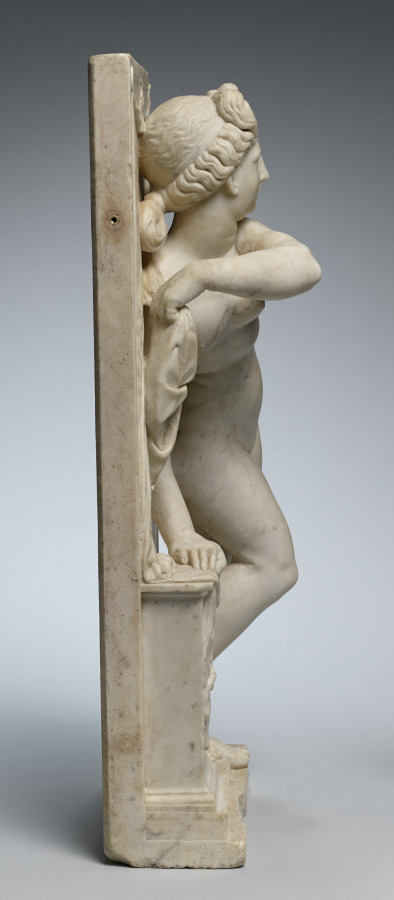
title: Dido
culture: Italy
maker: Aurelio Lombardo (Italian, 1501–1563)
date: c. 1525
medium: marble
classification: Sculpture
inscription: PVNICA SVM [DIDO ERE]XI QVAE MOENIA BYRSA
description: Artists customarily portrayed Dido as a forlorn lover abandoned by the Trojan hero, Aeneas, but here she is a conquering queen. Dido draws aside an oxhide curtain, a reference to the mythical founding of Carthage (in modern-day Tunisia, North Africa), when she was given an oxhide to demarcate granted land. By cutting it into thin strips she was able to encircle the future city. Dido was likely created for display in a studiolo, a place of study featuring refined works of art appreciated by humanist scholars and aficionados during the Renaissance.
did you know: Dido’s nudity and hairstyle are allusions to ancient Greek images of Aphrodite.